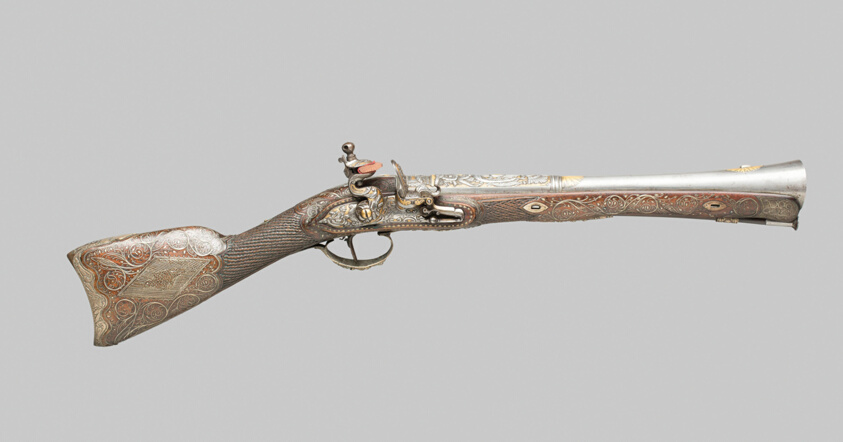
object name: Arms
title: Flintlock Blunderbuss Carbine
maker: Spanish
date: 1500/25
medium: Walnut, silver, and gold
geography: Spain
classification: firearm-long gun; arms; arms and armor